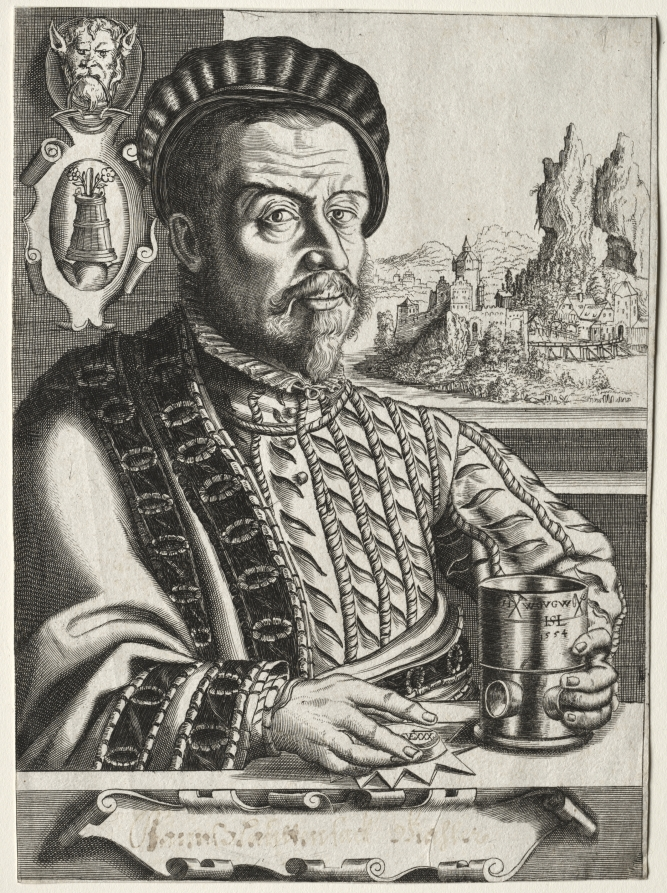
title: Ulrich Schwaiger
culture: Germany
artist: Hanns Lautensack (German, 1524–1566)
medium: engraving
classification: Print